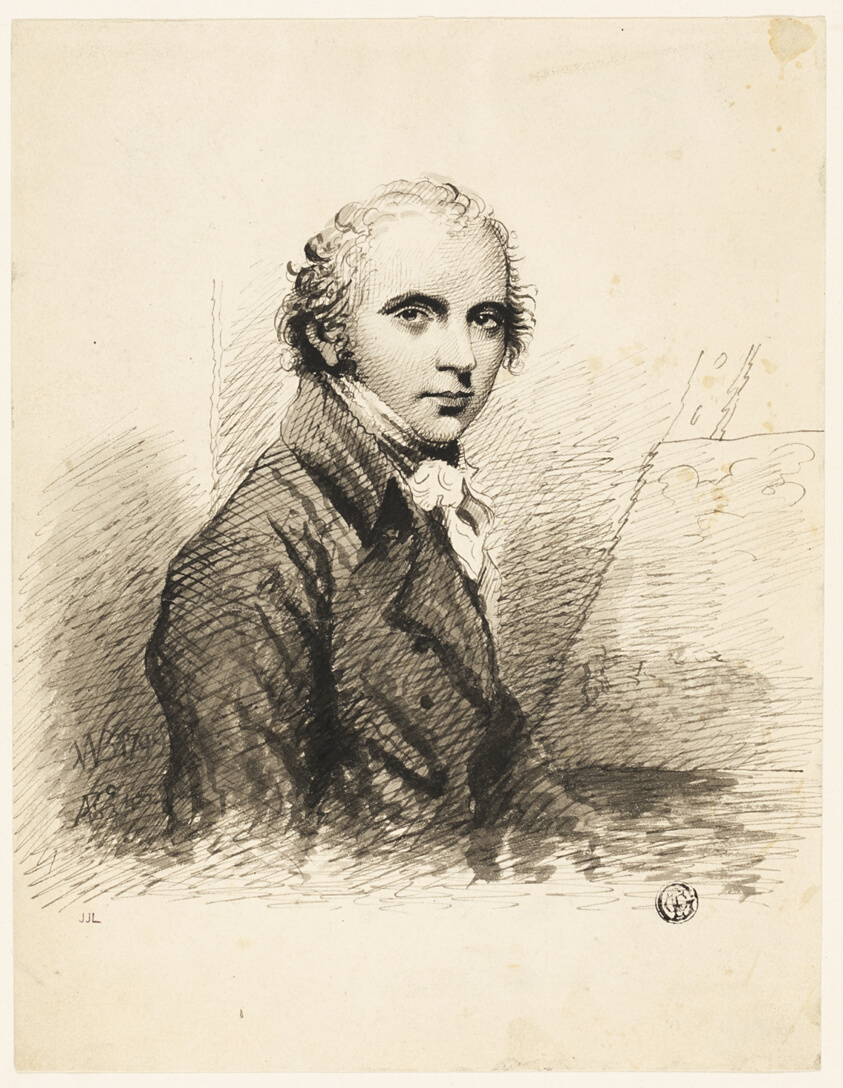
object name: Drawing and Watercolor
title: Self-Portrait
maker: After Sir William Beechey; English, 1753-1839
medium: Pen and black ink, with brush and gray wash, on ivory wove paper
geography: England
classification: pen and ink drawings; drawings (visual works); prints and drawing